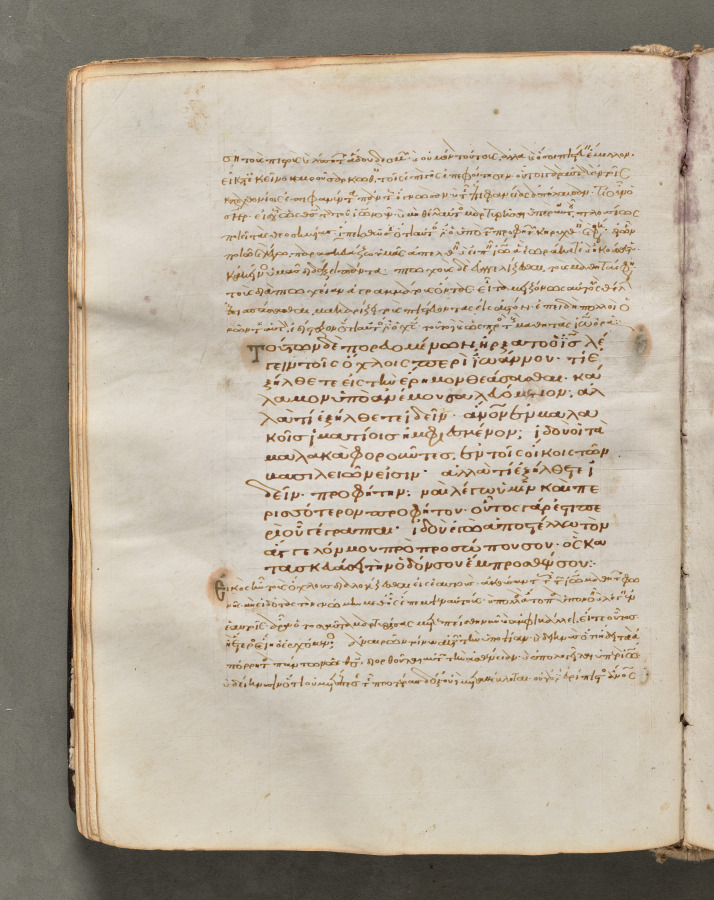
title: Text, folio 47 (verso), from a Gospel Book with Commentaries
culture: Byzantium, Constantinople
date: c. 1000–1100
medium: ink, tempera, and gold on vellum; leather binding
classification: Bound Volume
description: Each of the four gospels in this book opens on a page with brilliantly illuminated borders depicting the author of the text as well as birds-principally peacocks, symbols of the immortality of the soul-and fountains, representing the fountain of life and the salvation of the soul. This volume consists of 428 leaves with texts in Greek. Its level of sophistication suggests that it was probably written and decorated in a monastery in Constantinople.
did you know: Gospel Books were carried in procession through Byzantine churches.